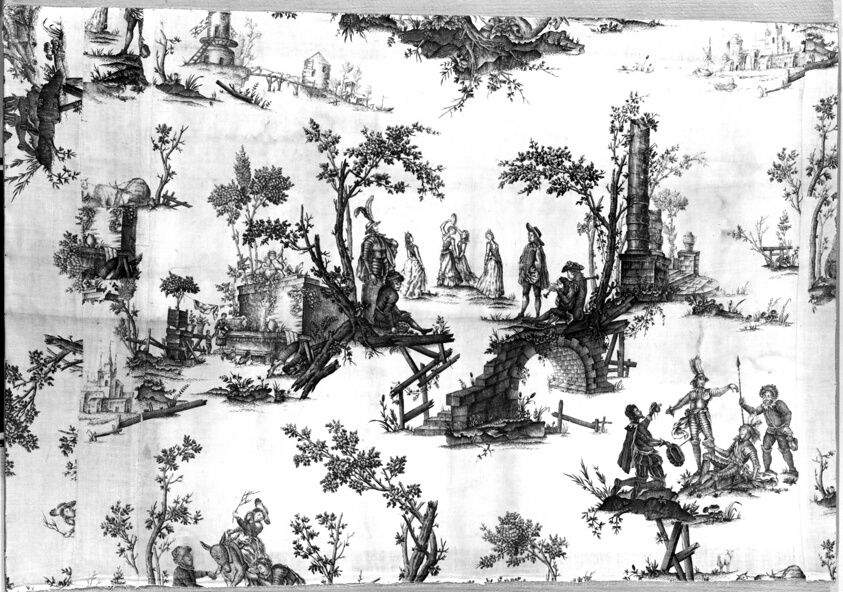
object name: Textile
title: Don Quichotte (Don Quixote) (Furnishing Fabric)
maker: Possibly after design by Jean Jacques Lagrenèe le Jeune (French, 1739–1821) after engravings by Charles Nicolas Cochin l'Aîné (French, 1688–1754), Magdaleine Hortenels Cochin (French, 1683–1767), Jean Baptiste Haussard (French, 1679/80–1749), and Louis Silvestre l'Aîné (French, 1664–1740); Based on paintings by Charles Antoine Coypel (French, 1694–1752); France, Nantes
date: c. 1785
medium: Cotton, plain weave; copperplate printed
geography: France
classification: textile; weaving - printed; furnishing textile